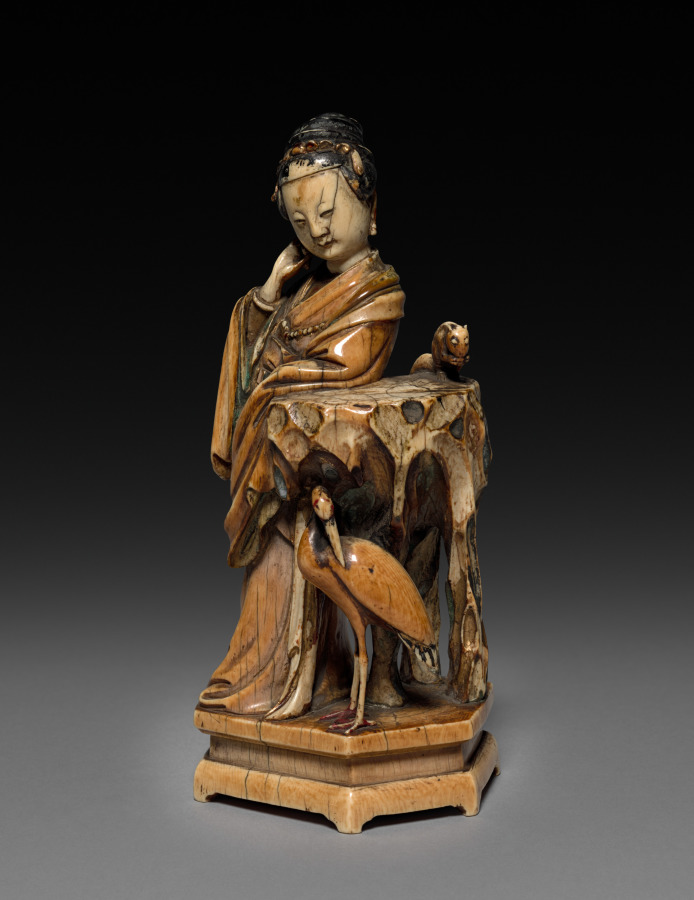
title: Female Figure with Crane and Squirrel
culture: China, Qing dynasty (1644-1911), Kangxi reign (1662-1722)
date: 1662–1722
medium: ivory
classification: Ivory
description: In the Qing dynasty (1644–1911), luxury items became more affordable to larger parts of the society, including women, merchants, and literati in non-official positions. Imperial patronage and a growing urban population encouraged consumption of luxury goods and local craftmanship. This ivory form of a woman with a crane illustrates the superb skills and the creative mind of the talented artisan who sought clients on a competitive market.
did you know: The ivory has aged to a rich amber, while traces of its original red and green paint remain on the woman’s cuffs and collar.